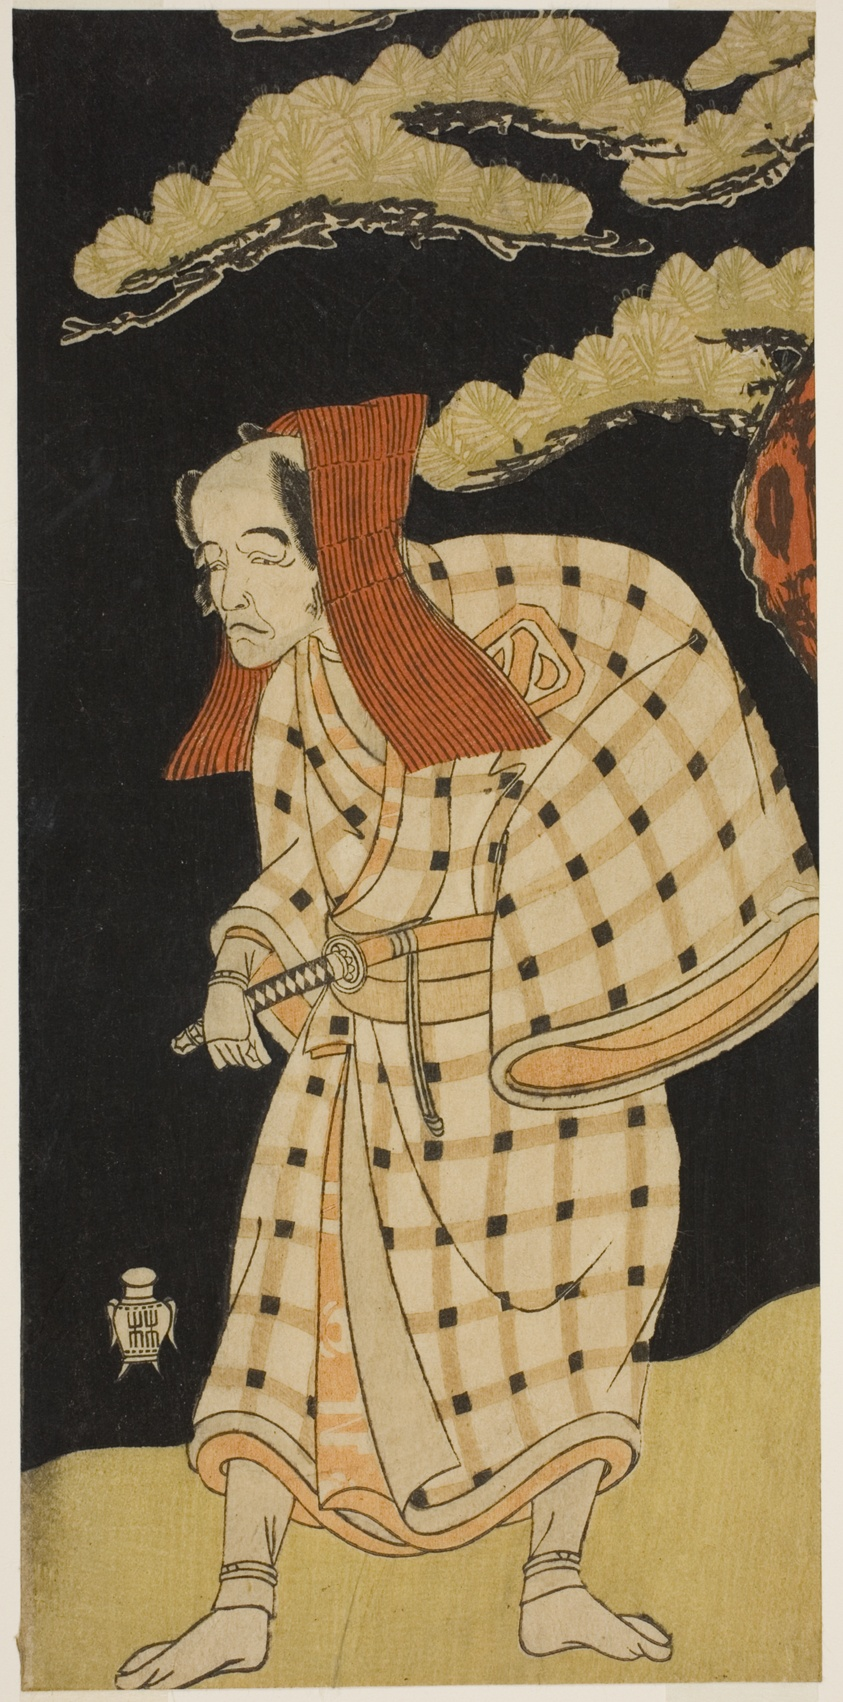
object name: Print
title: The Actor Arashi Otohachi I as Numataro Kyusei Disguised as the Burglar Ipponzaemon in the Play Otokoyama Yunzei Kurabe, Performed at the Ichimura Theater in the Eleventh Month, 1768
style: Japanese (culture or style)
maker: Katsukawa Shunsho 勝川 春章; Japanese, 1726-1792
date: c. 1768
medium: Color woodblock print; hosoban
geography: Japan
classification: woodblock print; print; asian art